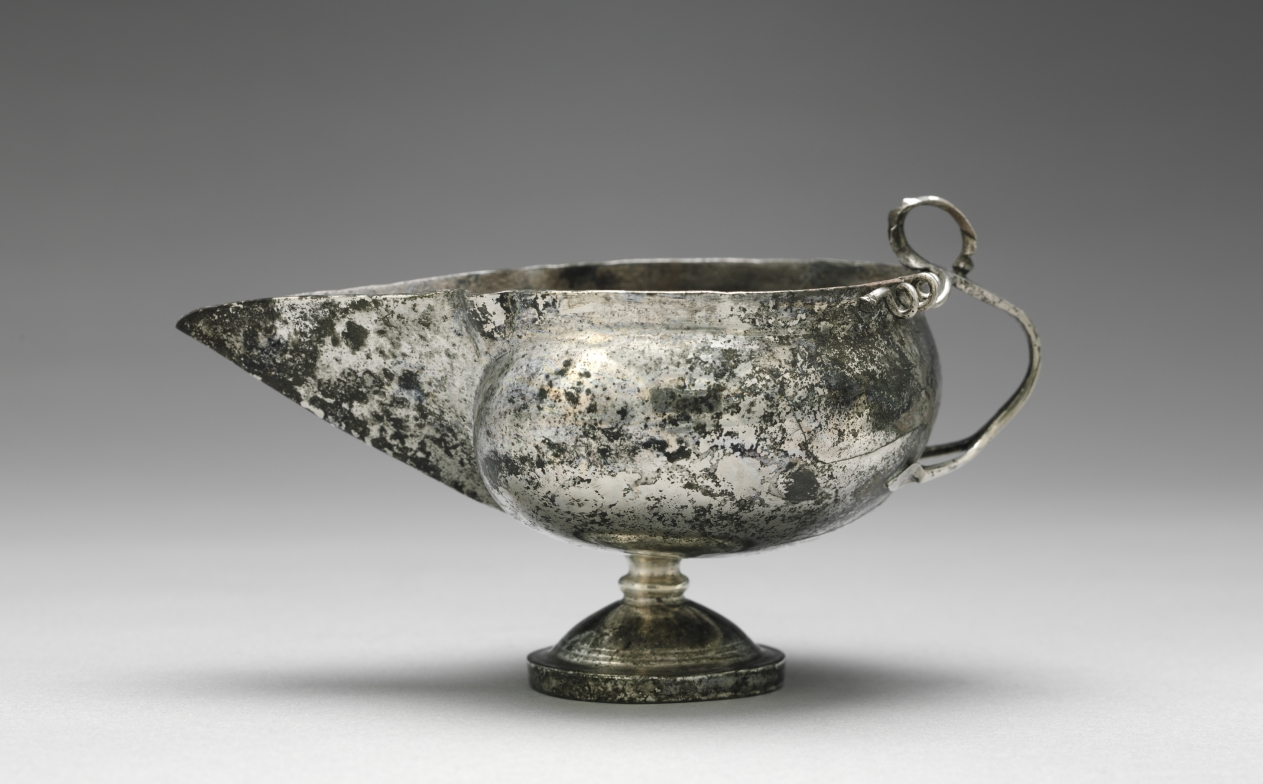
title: Spouted Pitcher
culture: Byzantium, Syria(?), Byzantine period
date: 300–600 CE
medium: silver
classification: Metalwork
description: A large quantity of tableware survives from the Roman Empire, including this piece from Antioch and the Eastern Mediterranean. Most of the recovered groups of silver seem to have been hoards concealed during times of trouble. A complete table service, called a ministerium in Latin and a synthesis in Greek, consisted of silver for eating and drinking: trays, platters, plates, dishes, spoons, pepper dispensers, goblets, pitchers, ladles, and bowls. The god of wine, Dionysos, was frequently depicted on drinking and eating vessels.